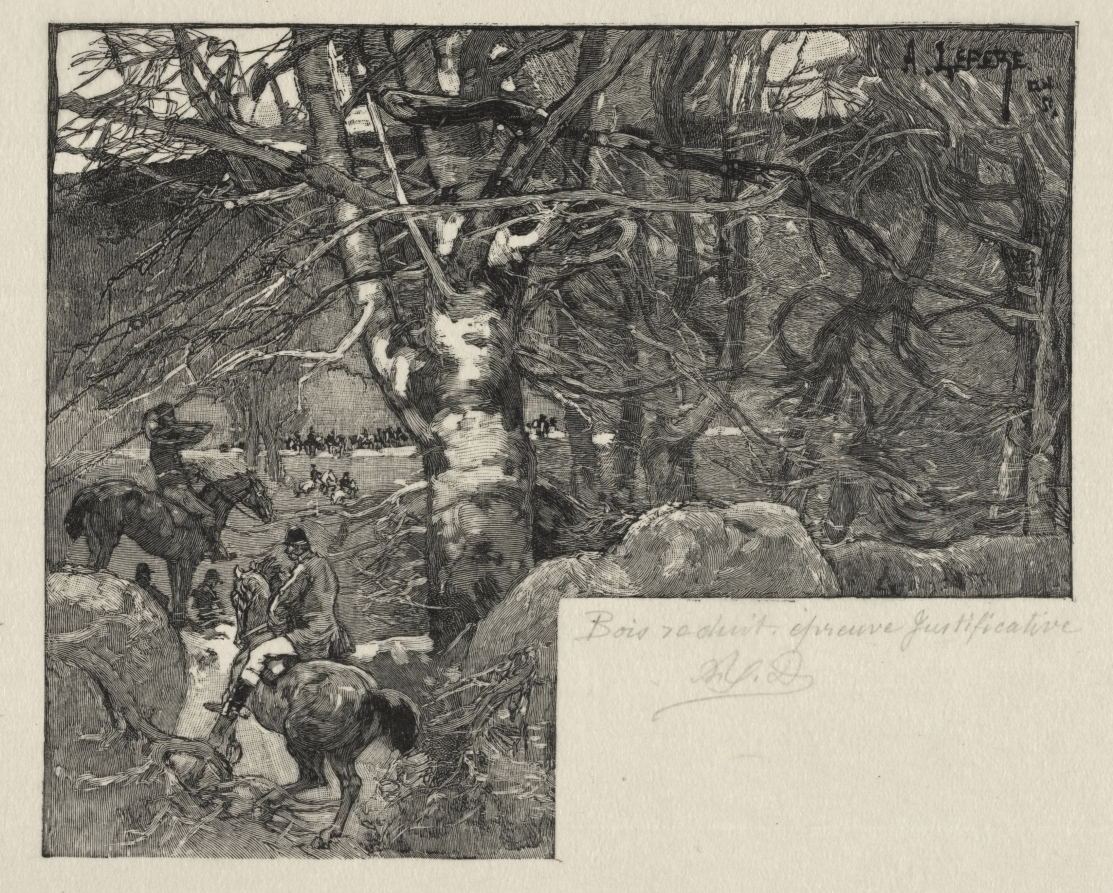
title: Une Chasse au Mont Gérard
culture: France, 19th-20th century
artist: Auguste Louis Lepère (French, 1849–1918)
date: 1887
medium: wood engraving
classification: Print